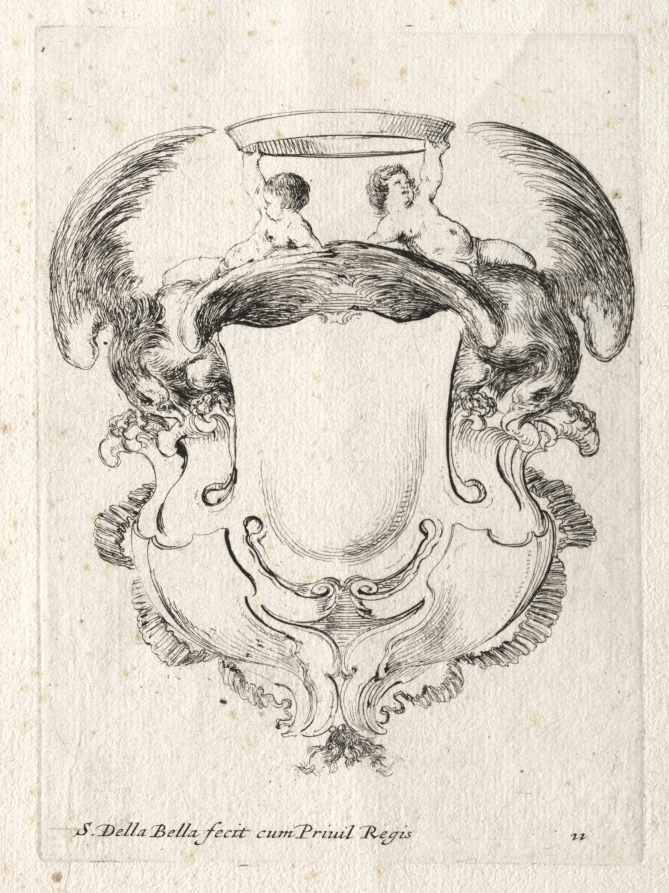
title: New Model for a Cartouche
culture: Italy, 17th century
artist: Stefano Della Bella (Italian, 1610–1664)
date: 1647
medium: etching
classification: Print